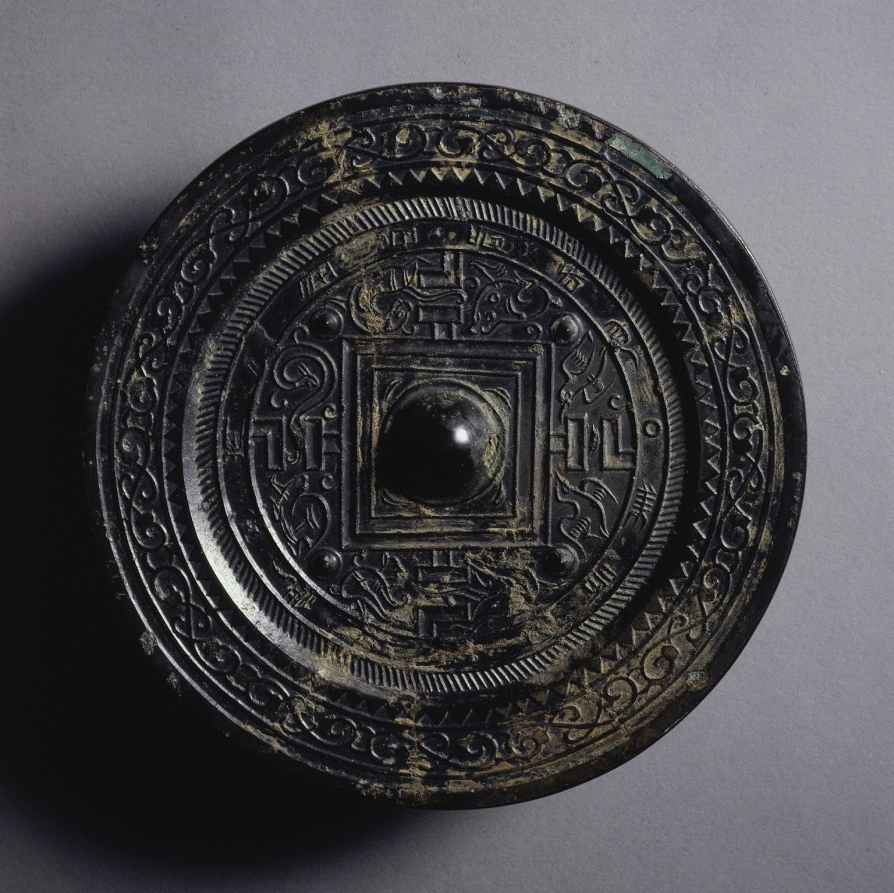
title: TLV Mirror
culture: China, Eastern Han dynasty (25–220 CE)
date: 1–early 200s CE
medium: bronze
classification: Metalwork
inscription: It is said that [the making of this] mirror marks an epoch. At the left is the blue [dragon] and at the right the white tiger. Long . . .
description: The mirror was cast in a ceramic mold. The center knob and nipples were polished with a bow drill, the raised flat areas of decoration were polished and a chisel was used to smooth the square channel. The mirror was broken into five pieces that are now joined with lead tin solder. Dirt was applied to hide the joins.